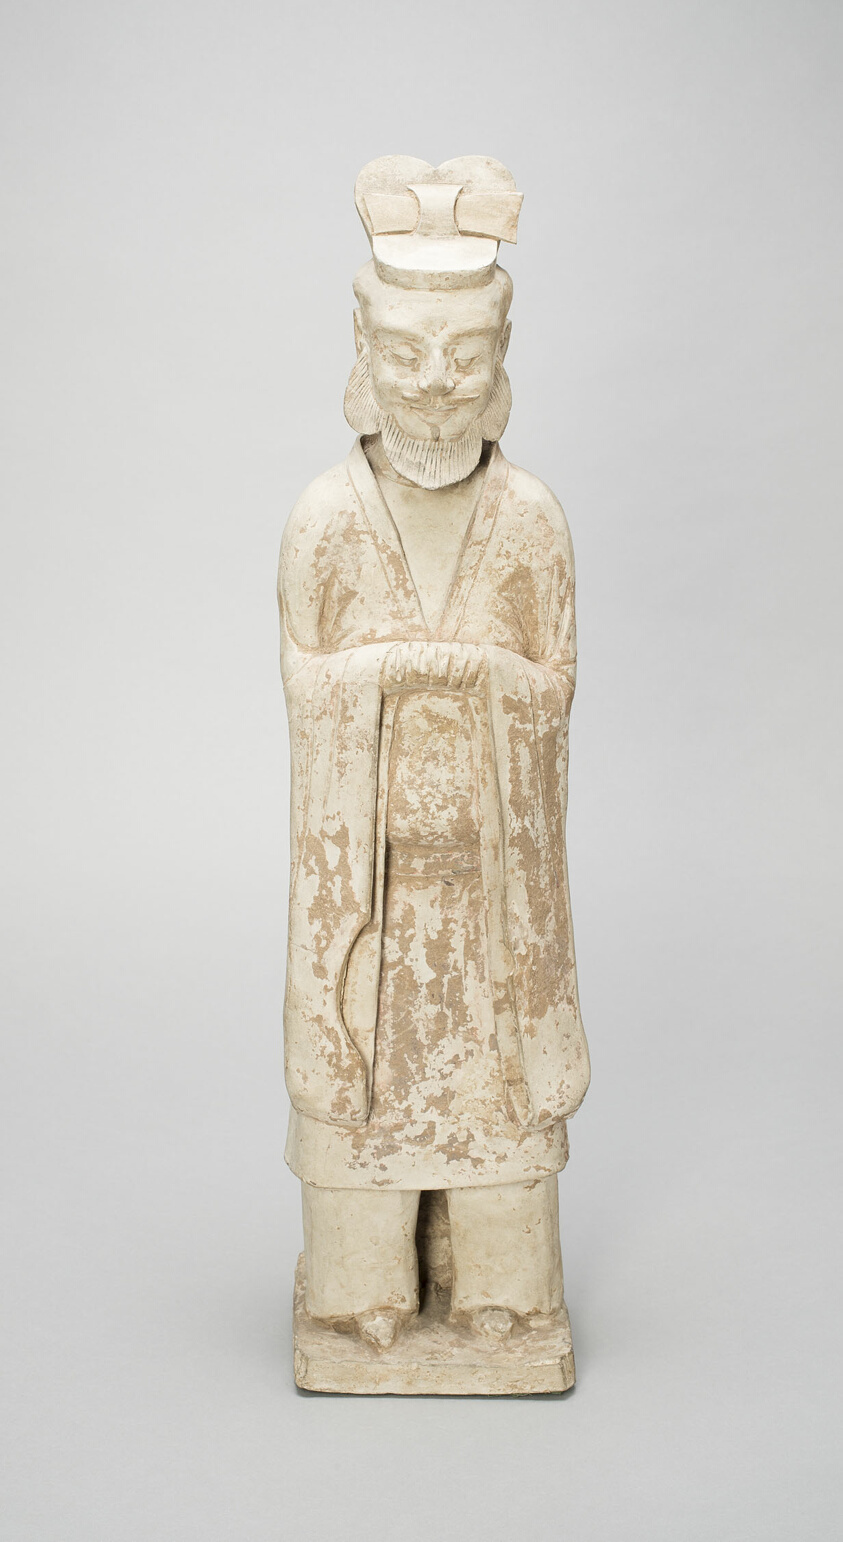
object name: Sculpture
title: Standing Bearded Official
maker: China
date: Tang dynasty (618–907) or later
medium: Earthenware with traces of polychrome pigment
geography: China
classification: ceramics; asian art; sculpture